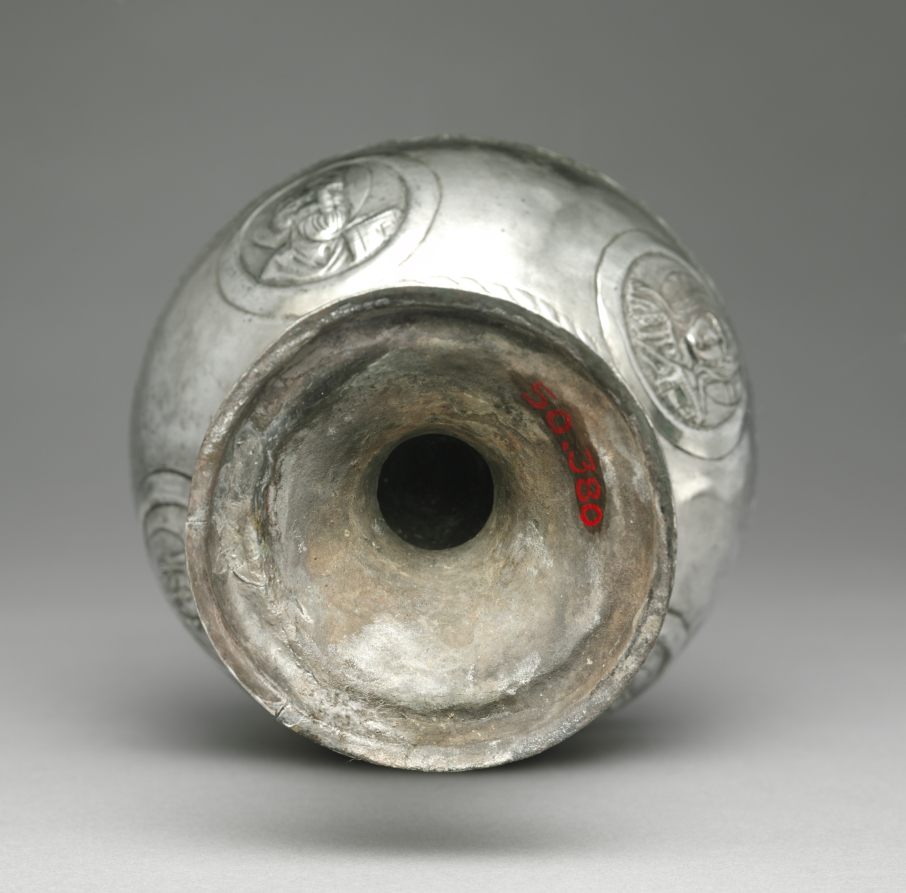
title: Chalice from the Beth Misona Treasure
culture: early Byzantium, Constantinople or Syria, Byzantine period, 6th-7th Century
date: c. 500–700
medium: silver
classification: Metalwork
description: These four liturgical silver vessels—a paten and three chalices (1950.378–81)—form what is now called the Beth Misona Treasure, named for the village in northern Syria for which the objects were made. While nothing is known about the exact location and circumstances of the treasure's discovery, the people of the village of Beth Misona were, like other Christian communities in Syria and Palestine, probably forced to bury their church silver to hide it from the Persians or Arabs, who conquered their lands in the first half of the 600s. The paten, which held pieces of Eucharistic bread used during Mass, is decorated with an engraved Latin cross surrounded by a dedicatory inscription that names the paten's donor—Domnos—and its original location, the church of Saint Sergios in Beth Misona. The chalices, which contained the Eucharistic wine used during Mass, feature broad cups decorated with portrait busts of Saints Peter and Paul, Christ, and the Virgin. One chalice bears a dedicatory inscription naming its donor—Kyriakos, Domnos's son—and the priest of the church that received the pious gift—Zeno.